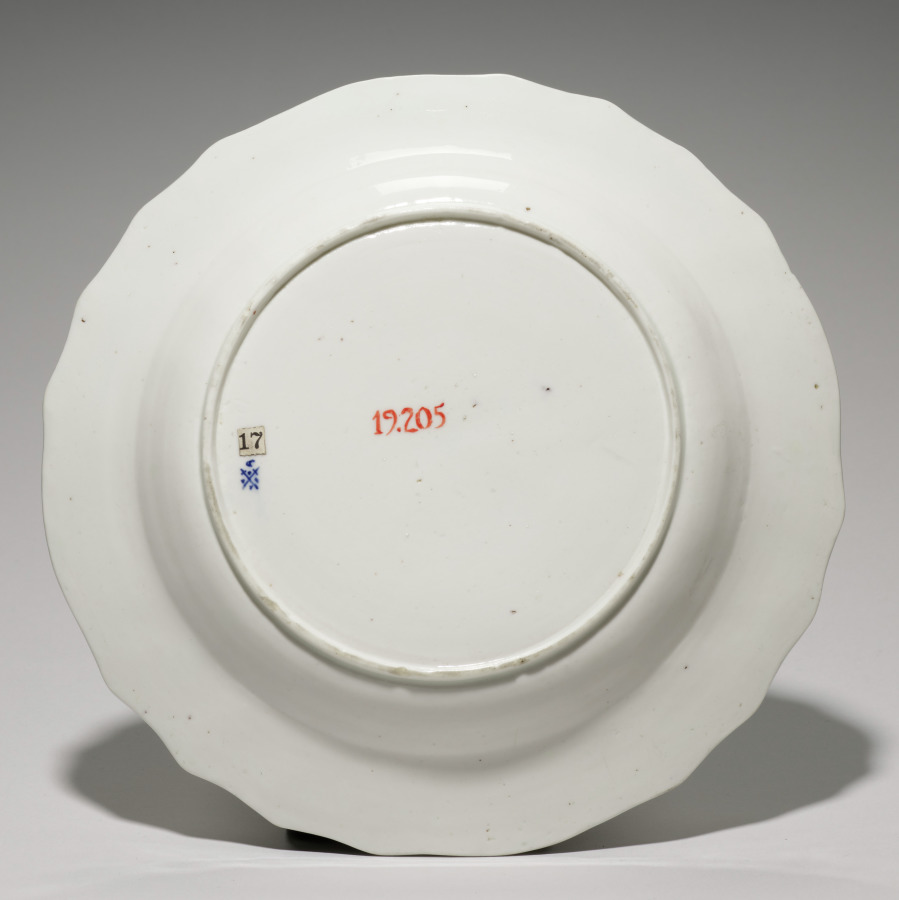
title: Plate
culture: Belgium/France, Tournay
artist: Tournay Factory (Belgian)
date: c. 1800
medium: porcelain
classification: Ceramic